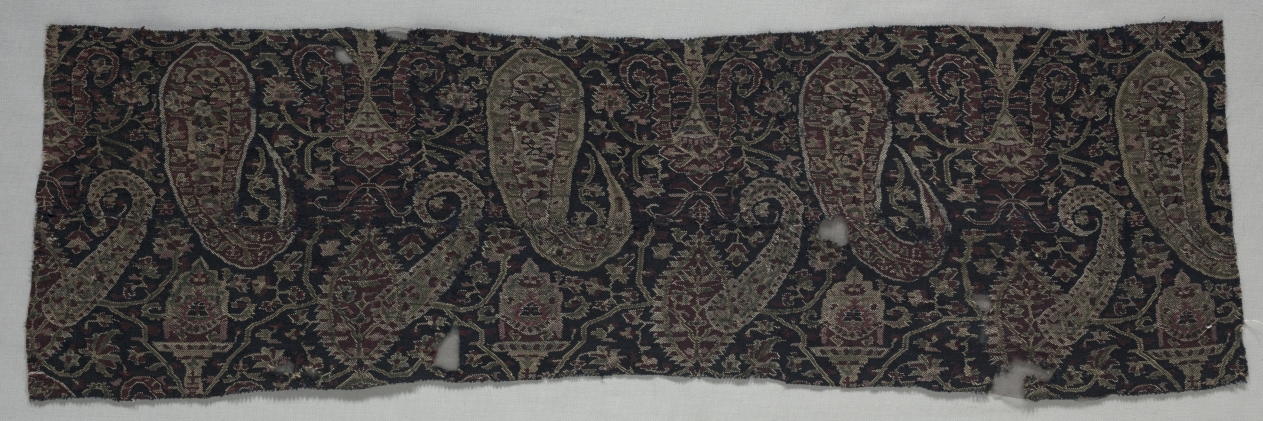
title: Fragment of a Shawl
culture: India, Punjab, 19th century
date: 1800s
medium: tapestry twill; wool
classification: Textile